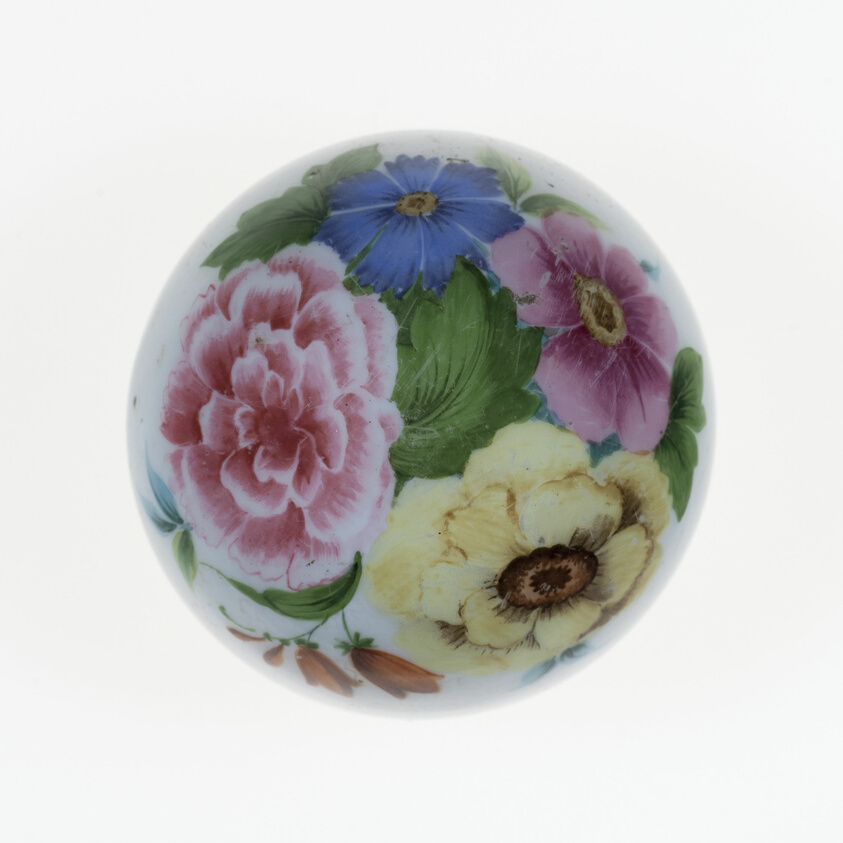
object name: Glass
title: Paperweight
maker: Possibly Bohemian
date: c. 1848–52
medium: Glass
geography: Czech Republic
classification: paperweight; glass